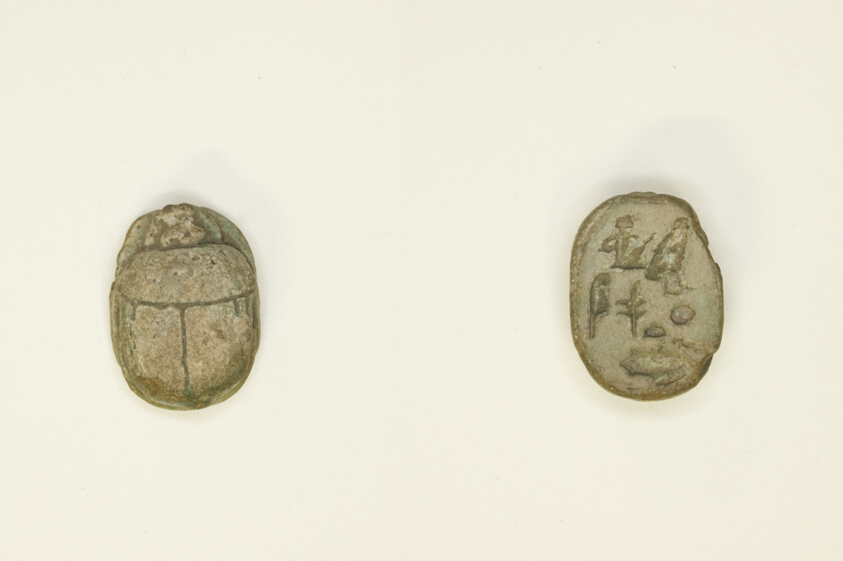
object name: Costume and Accessories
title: Scarab: Wish Formula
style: egyptian, ancient, late period (egyptian), new kingdom, third intermediate period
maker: Egyptian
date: New Kingdom–Late Period, Dynasties 18–26 (about 1550–525 BCE)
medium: Steatite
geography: Egypt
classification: scarab; ancient art; costume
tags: Hieroglyphs, insects